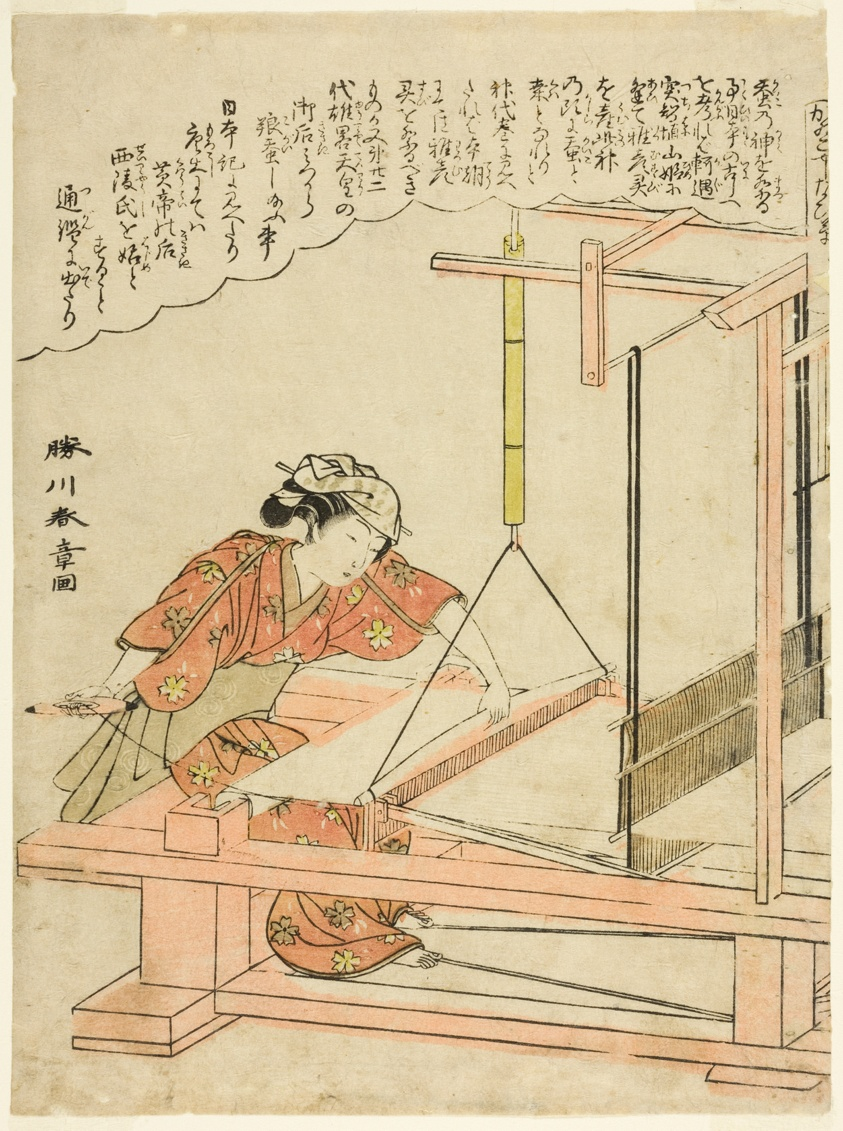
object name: Print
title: Weaving silk, plate 11 from the series "Silkworm Cultivation (Kaiko yashinai gusa)"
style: Japanese (culture or style)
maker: Katsukawa Shunsho 勝川 春章; Japanese, 1726-1792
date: c. 1772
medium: Color woodblock print; chuban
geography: Japan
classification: woodblock print; print; asian art